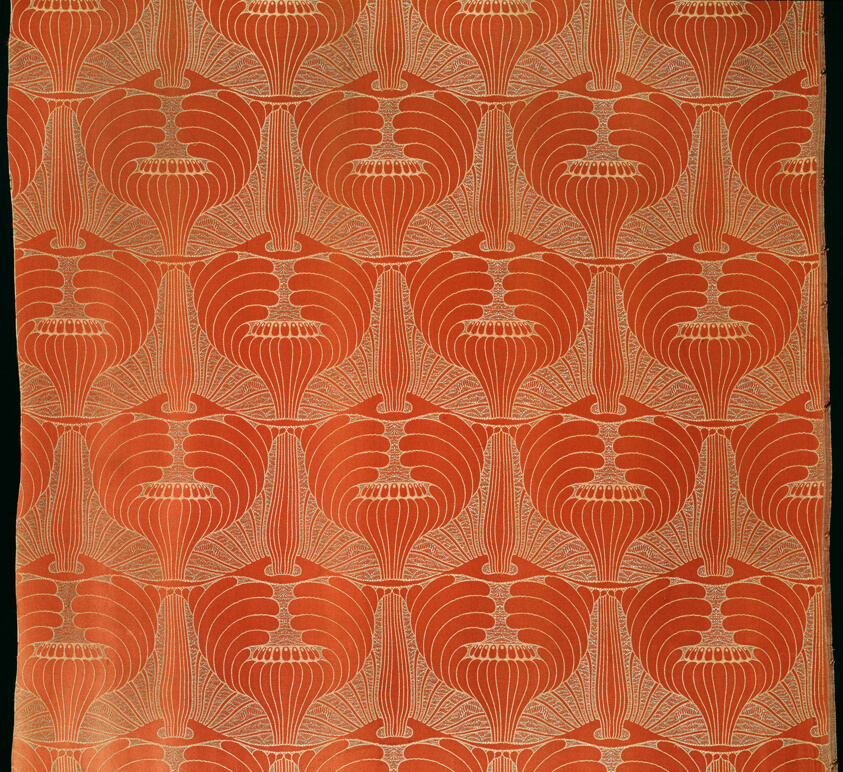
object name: Textile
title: Mohnköpfe (Poppyheads) (Dress or Furnishing Fabric)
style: Modernism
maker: Designed by Koloman Moser (Austrian, 1868–1918); Produced by Johan Backhausen und Söhne (Austrian, founded 1849); Austria, Vienna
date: 1900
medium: Silk, wild silk, and cotton, warp-float faced 15:1 satin weave self-patterned by ground weft floats; woven on loom with Jacquard attachment; right selvage present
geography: Vienna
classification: textile; weaving; furnishing textile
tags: red (color), floral motifs, fashion